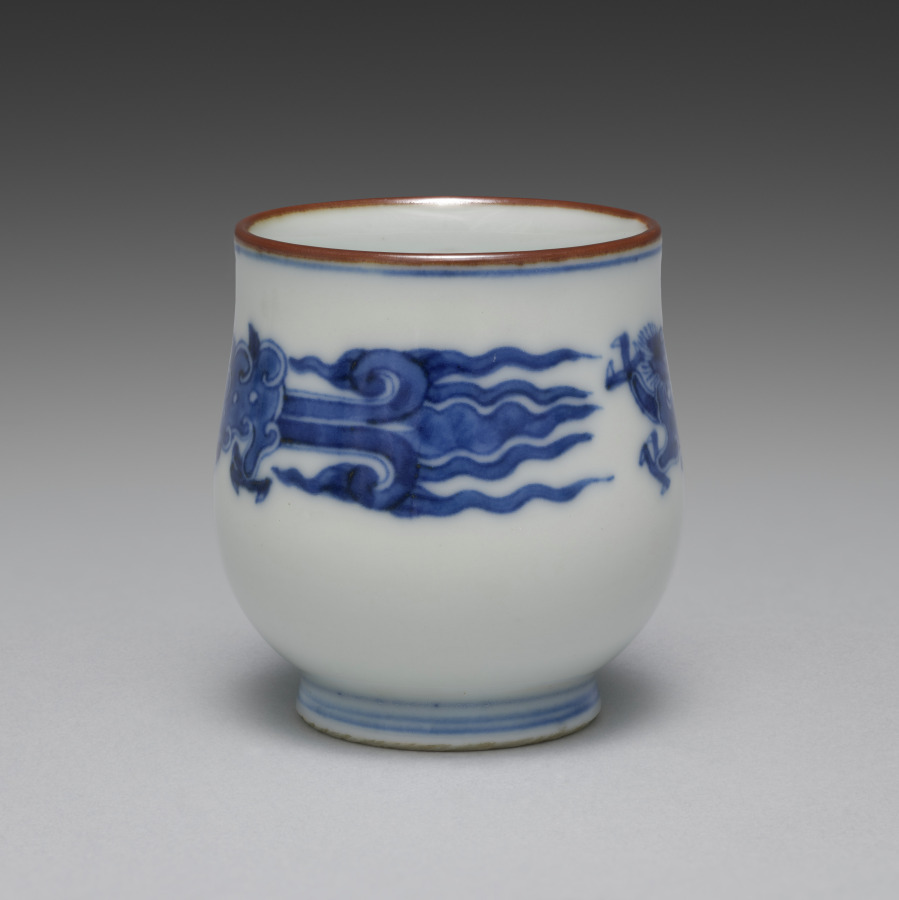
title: Cup from Sake Cups with Dragons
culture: Japan, Meiji period (1868–1912)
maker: Seifū Yohei III (Japanese, 1851–1914)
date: c. 1893–1914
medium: One from a set of six sake cups; porcelain with underglaze blue and iron oxide rims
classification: Ceramic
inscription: 大日本清風造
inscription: 清風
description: Each of these sake cups pictures two backward-looking dragons. The highly stylized creatures resemble jade carvings.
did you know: Seifū Yohei III was inspired by the Chinese mythical animals that were common on porcelain objects made at Jingdezhen in China during the Ming dynasty (1368–1644) and then exported around the world.